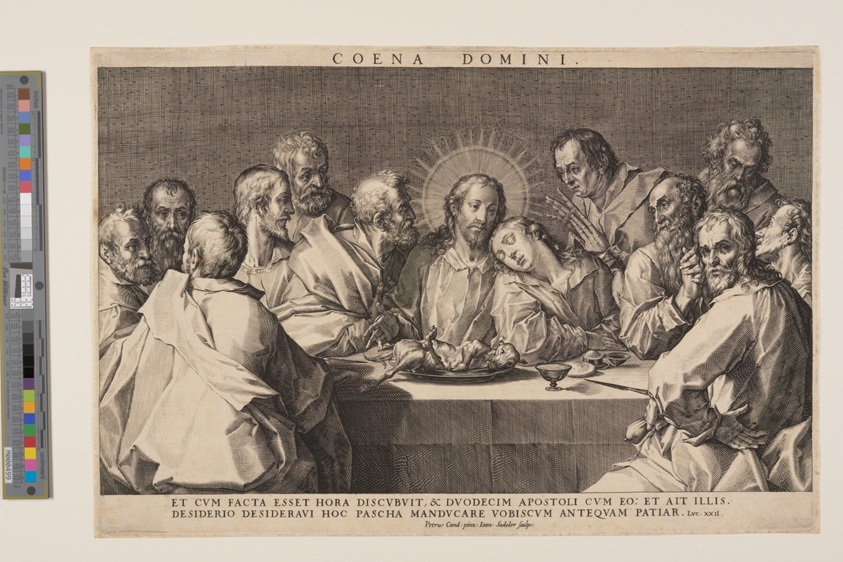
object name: Print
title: The Last Supper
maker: Jan Sadeler I (Flemish, 1550–1600); after Pieter de Witte (Flemish, 1548-1628)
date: c. 1590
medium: Engraving on ivory laid paper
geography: Flanders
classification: engraving; paper; print; prints and drawing